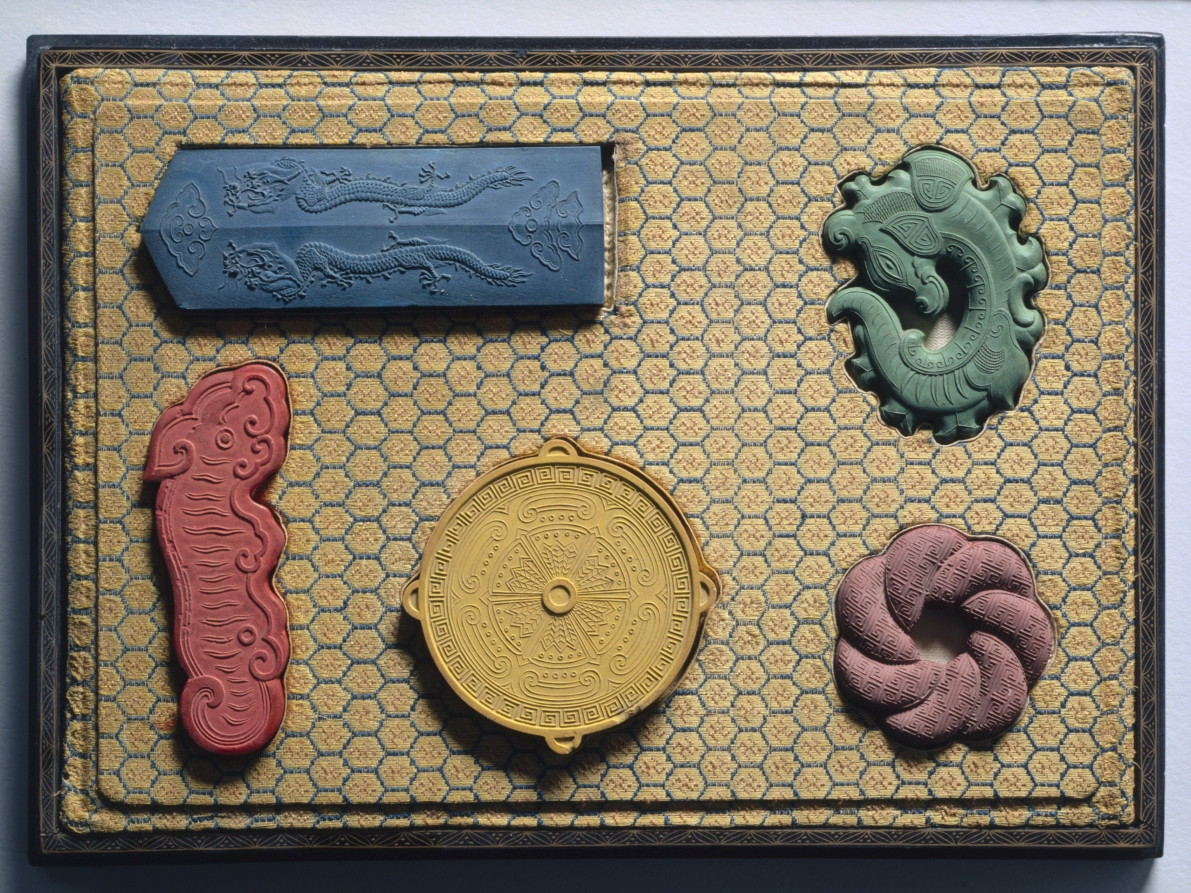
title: Box with Ink Cakes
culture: China, Qing dynasty (1644-1911), Jiaqing reign (1795-1820)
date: 1795–1820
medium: Lacquer and silk box; molded ink in red, yellow, blue, and green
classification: Lacquer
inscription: 江西巡撫臣陳淮恭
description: Ink cakes (also called ink sticks) are dissolved with the addition of water and then ground on the surface of a flat square stone into liquid ink for painting and calligraphy. The precious ink cakes here, however, have never been used. The inscription on the side of the blue Gui scepter-shaped ink cake says that the set was commissioned by Chen Huai, Governor of Jiangxi province. The green and bright red ink cakes take the forms of archaic dragons. The dull red ink cake resembles a brocade knot. The yellow cake shaped like the Buddhist "Wheel of the Law" is inscribed on the reverse.